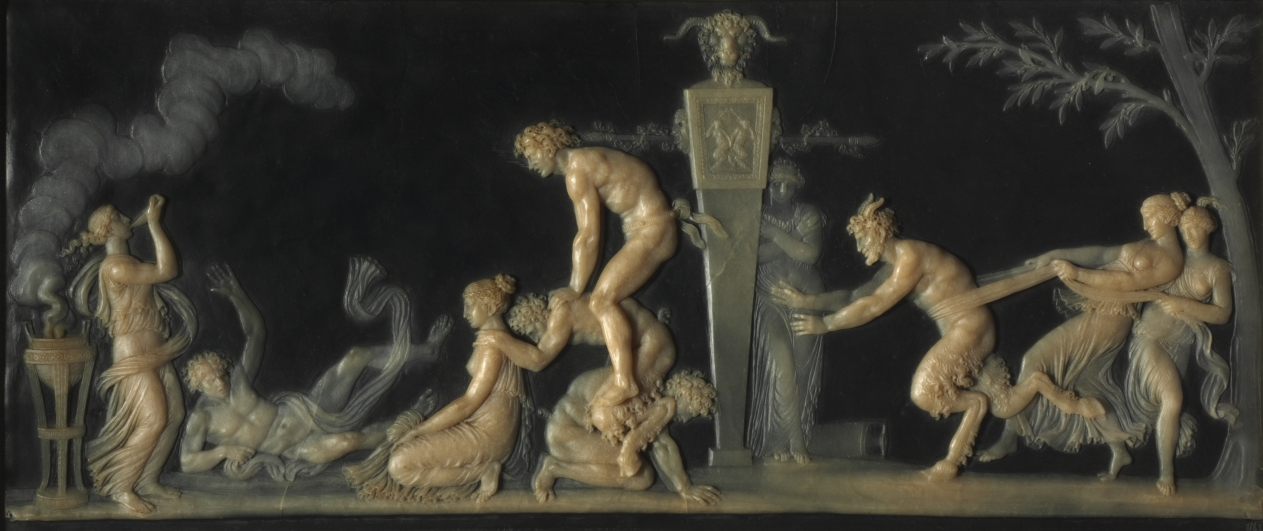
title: The Game of Leap Frog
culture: France, 18th century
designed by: Jean Guillaume Moitte (French, 1746–1810)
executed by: Antoine-François Gérard (French, 1760–1843)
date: 1785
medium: wax on slate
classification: Sculpture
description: This decorative frieze follows the design of Moitte, an artist known for reliefs, especially in the beginning stages of his career. Some of Moitte's favorite subjects in this period were Bacchic scenes of antiquity. These images of revelry and sensuousness are based on classical narratives; however, there is no evidence that the ancients played games of leapfrog, and so the subject is Moitte's invention, with a contemporary game of leapfrog performed by the mythical cohorts of Bacchus. The design of the drapery is typical of Moitte, especially the keenly animated dress. Moitte's early technique emulated painting in bas-relief. The sculptor, Gérard, follows Moitte's design, using the unusual mediums of slate and wax. His technique is not entirely understood, however, it is thought to be a combination of modeling and carving.